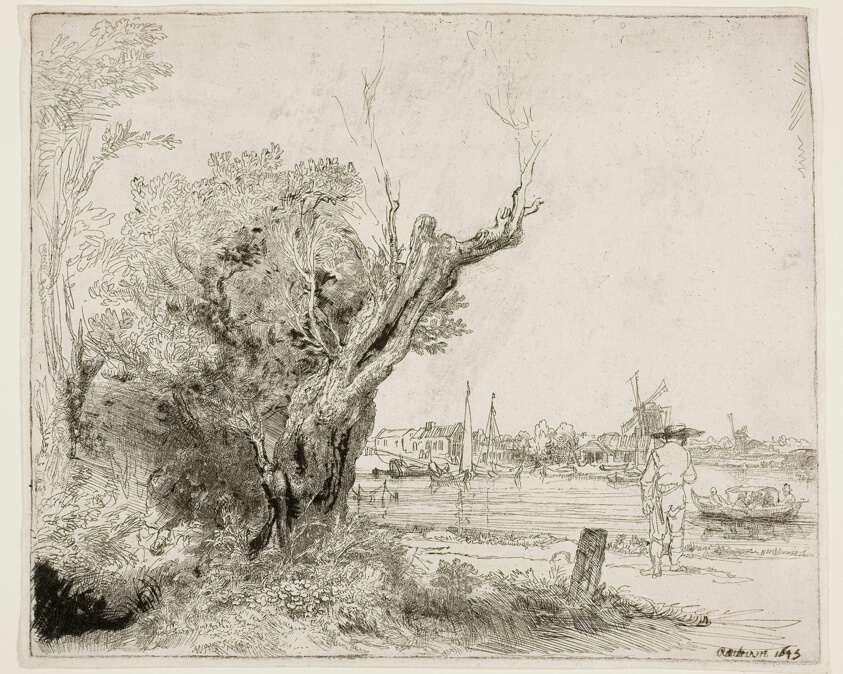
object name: Print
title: The Omval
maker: Rembrandt van Rijn (Dutch, 1606-1669)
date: 1645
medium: Etching and drypoint on white laid paper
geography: Holland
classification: etching; print; prints and drawing; paper; drypoint